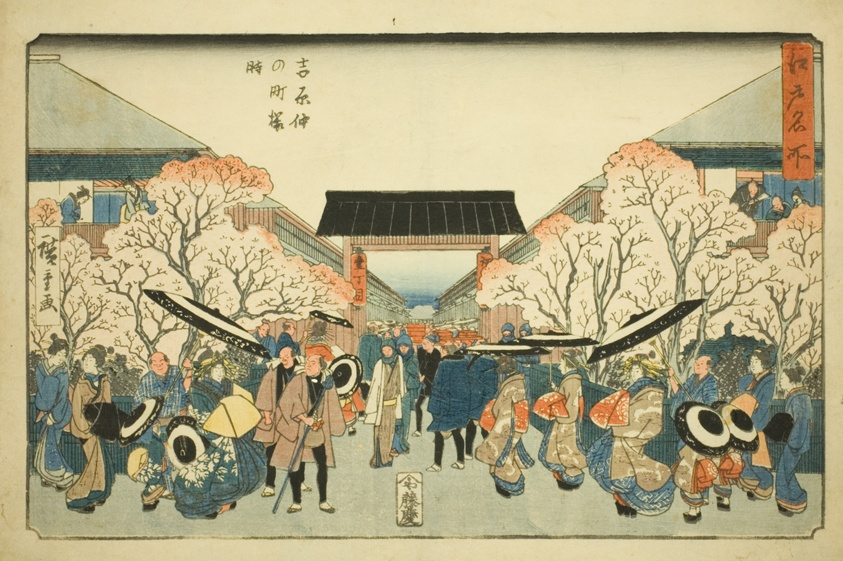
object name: Print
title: Cherry Blossom Season at Nakanocho in the Yoshiwara (Yoshiwara Nakanocho sakura toki), from the series "Famous Places in Edo (Edo meisho)"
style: Japanese (culture or style)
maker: Utagawa Hiroshige 歌川 広重; Japanese, 1797-1858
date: c. 1839/42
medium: Color woodblock print; oban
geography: Japan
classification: woodblock print; print; asian art